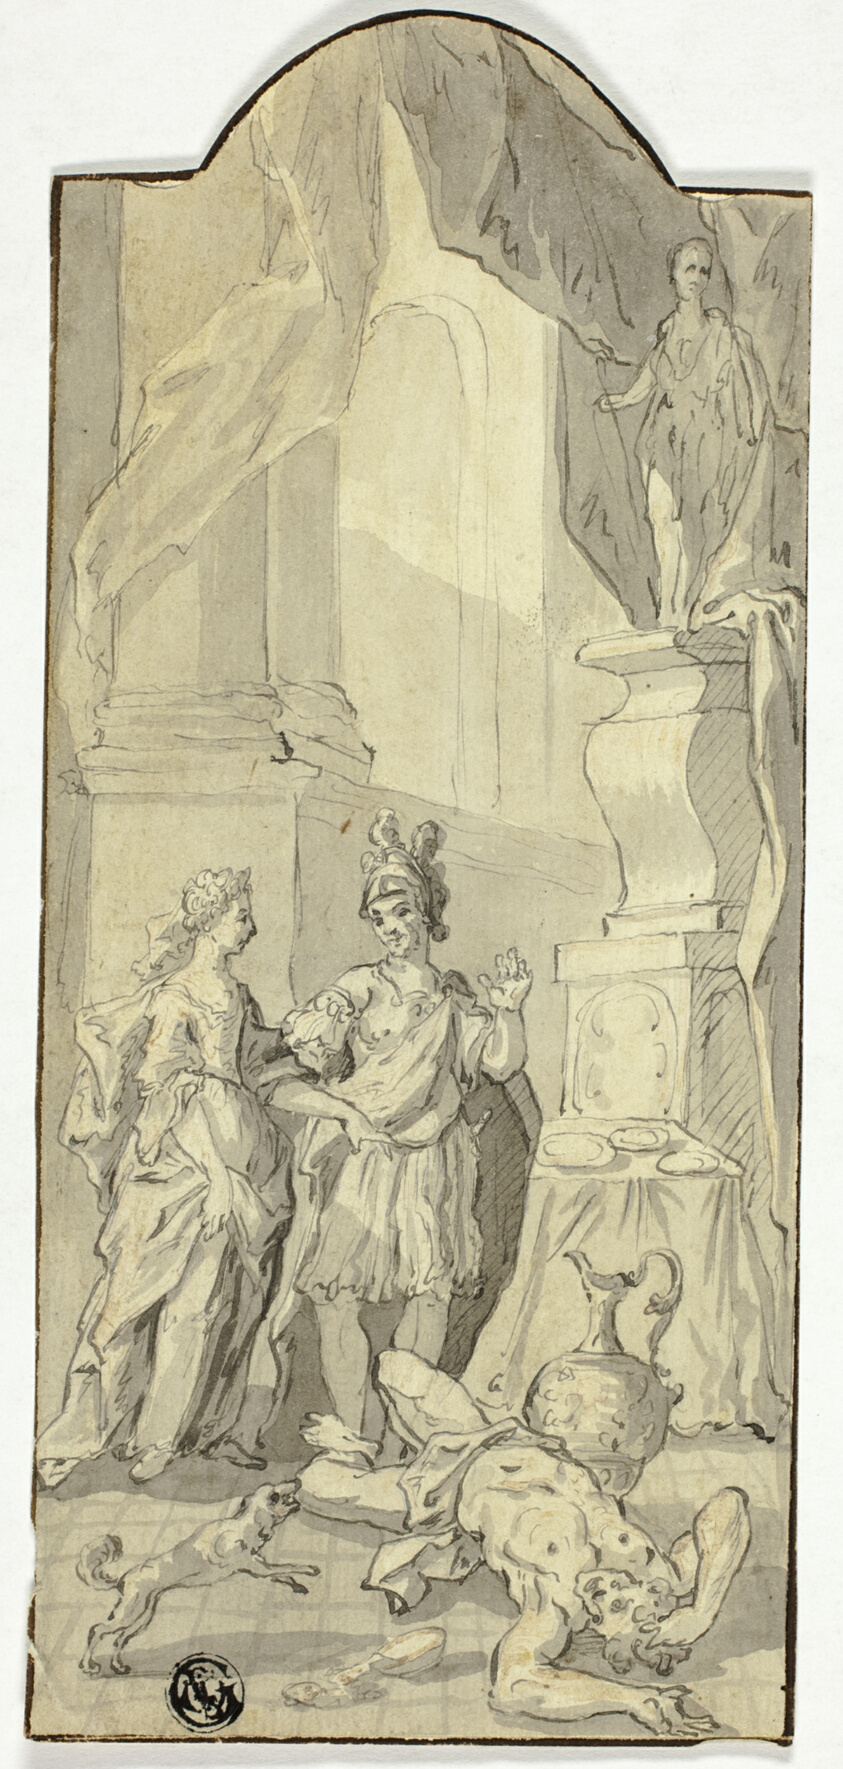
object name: Drawing and Watercolor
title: Warrior Conversing with Lady in Banquet, with Dead Man at Their Feet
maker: Unknown Artist; German, 17th century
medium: Pen and black, with brush and gray wash, over traces of red chalk, on ivory laid paper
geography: Germany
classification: ink or chalk wash; drawings (visual works); prints and drawing